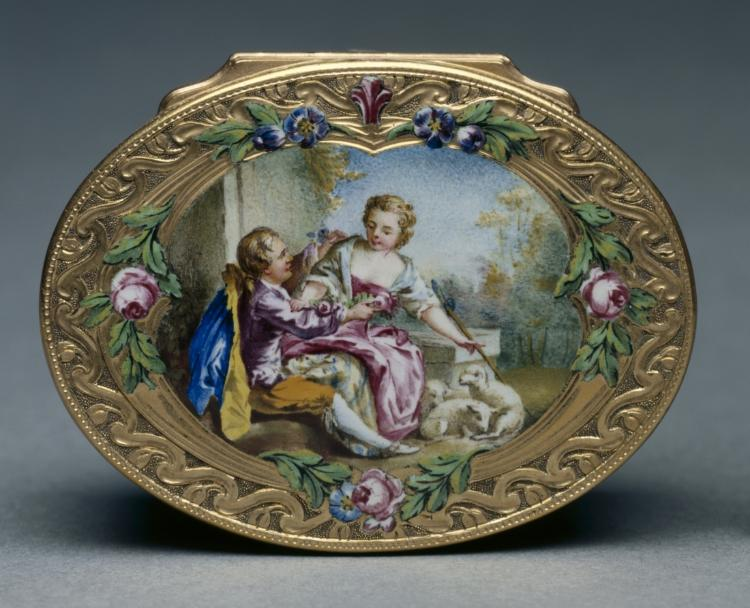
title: Snuff Box (Tabatière)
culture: France, 18th century (style of Louis XV)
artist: Francois Guillaume Tiron (French)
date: 1761–62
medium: gold and enamel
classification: Miscellaneous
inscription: [Maker's mark of Francois-Guillaume Tiron, master goldsmith in 1747, inside cover]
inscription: [Warden's mark, Paris, 1761-1762, inside cover]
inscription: [Charge mark of Eloi Brichard and Etienne Somfoye, Paris, 1756-1762, inside cover]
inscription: [Maker's mark of Francois-Guillaume Tiron, inside bottom]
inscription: [Warden's mark, 1761-1762, inside bottom]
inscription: [Charge mark of Brichard and Somfoye, inside bottom]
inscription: [Maker's mark of FG Tiron, left wall]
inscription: [Charge mark of Brichard and Somfoye, left wall]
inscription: [Warden's mark, Paris, 1761-1762, left wall]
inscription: [Discharge mark of J.J. Prevost, Paris, 1762-1768, bezel at right]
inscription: [Engraved number, maybe retailer's number]: "n. 13676"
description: The pastoral scenes that decorate this box are typical of the style of François Boucher, a celebrated painter of the period whose works were popularly reproduced on decorative arts. Snuff boxes, used practically as containers for powdered tobacco, were often decorated with miniature reproductions of notable works. The miniature on the cover is inspired by Boucher’s The Galant Pastor (Le Pasteur Gallant) (1738) and that on the bottom by The Amusement of the Shepherd Girl (L’Amusement de la Bergère) (1700s).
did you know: François Boucher was a favorite of the French royal court of Louis XV and named first painter of the king in 1765.